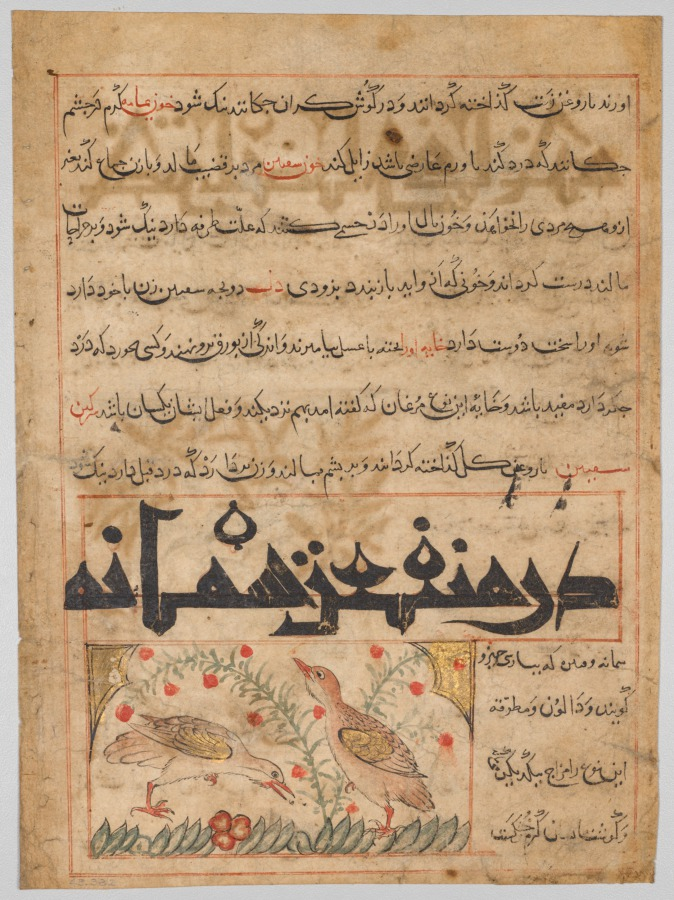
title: Folio from a Persian Manafi‘ al-Hayawan (The Benefits of Animals) of Abu Said Ubaid-Allah ibn Jibrail ibn Bakhtishu (died 1058–68) (verso)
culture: Iran, Maragah, Ilkhanid period (1256–1353)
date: c. 1300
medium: opaque watercolor, ink, and gold on paper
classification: Manuscript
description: The Benefits of Animals describes the physical characteristics of many different animals and provides their medicinal uses at the time. Most of the text on this page is a continuation of a section about doves from the previous page. It says, for example, that blood from dove wings cures sore eyes and cooked dove egg mixed with honey and a little borax is good for those with liver complaints. The large title written in Kufic script near the bottom of the page translates as “The Quail and its Qualities and Benefits,” marking the beginning of the next section. The illustration depicts two quails in active postures. The Mongol ruler of Iran from 1295 to 1304, Ghazan Khan, commissioned a Persian translation of the Arabic text, and this important page is from one of the earliest illustrated manuscripts.